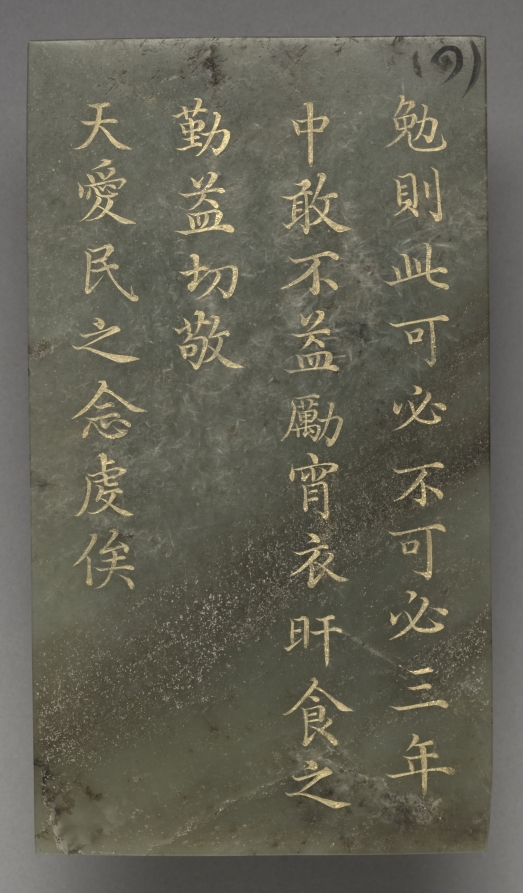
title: Tablet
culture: China, Qing dynasty (1644–1911), Qianlong reign (1736–95)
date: 1778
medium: jade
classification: Jade